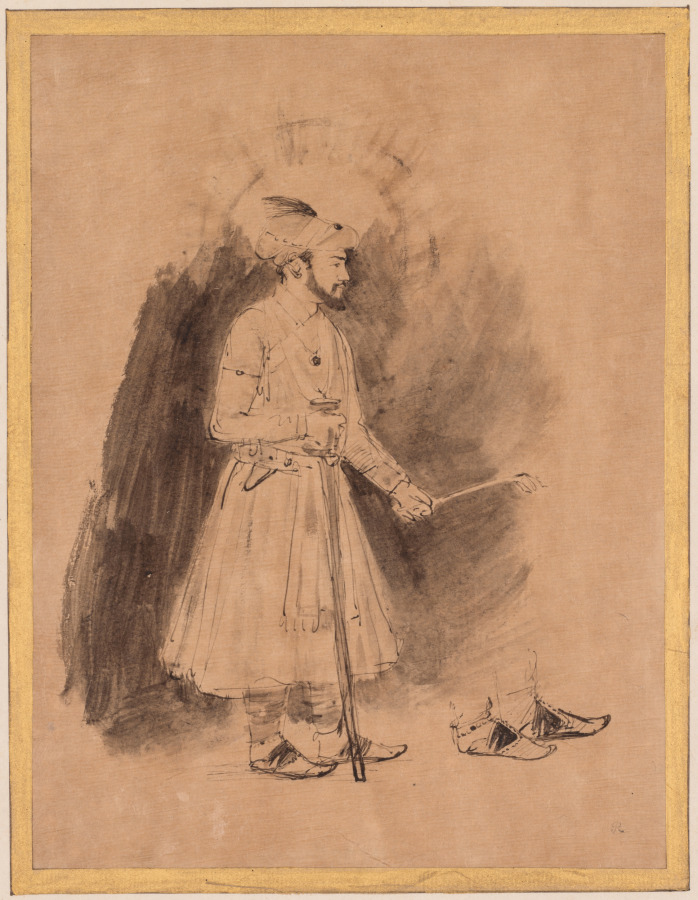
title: Shah Jahan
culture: Netherlands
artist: Rembrandt van Rijn (Dutch, 1606–1669)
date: c. 1656–61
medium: pen and brown ink and brush and brown wash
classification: Drawing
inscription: On verso of secondary support, upper center, in graphite: Portrait of; upper center, in brown ink: Portrait of Sháh Jahán Emperor of Hindustan [inscription in English] / Shah Jahan Padshah [inscription in Persian]; upper right, in graphite: Ouseley / written by Sir Gore Ou[seley] 1809; lower left, in graphite: 334; fragment of old mount (now removed), in blue pencil: 3[crossed out with black ink]; fragment of old mount (now removed), in gray ink: Portrait of Sháh Jehán / Emperor of Hindûstan; in black ink: 5[written over 5 in graphite] Indian Prince [underlined]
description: Rembrandt’s drawing portrays Shah Jahan, the ruler of the Mughal Empire from 1628-58. It is one of twenty-three drawings that Rembrandt made after Indian miniatures, which he had very likely studied in an album then in Holland. By the 18th century, the album had been dismantled, and the model for this drawing now resides at the Schloss Schönbrunn, Vienna. Rembrandt imposed his characteristic realist tendencies on a more detailed, formal, and stylized model, bringing the shah to life with especially fine pen strokes on the face and shoes mixed with evanescent brown ink washes around the figure that introduce a dynamic interplay of light, shade, and figure. Above the shah’s head, he scratched away parts of the ink and paper to create a nimbus shape that frames the profile. His meticulous technique and use of a rare and expensive Japanese paper suggest that he regarded his drawings after Mughal paintings as exceptional.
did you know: The Mughal ruler portrayed in this drawing carries a fly swatter in his left hand.